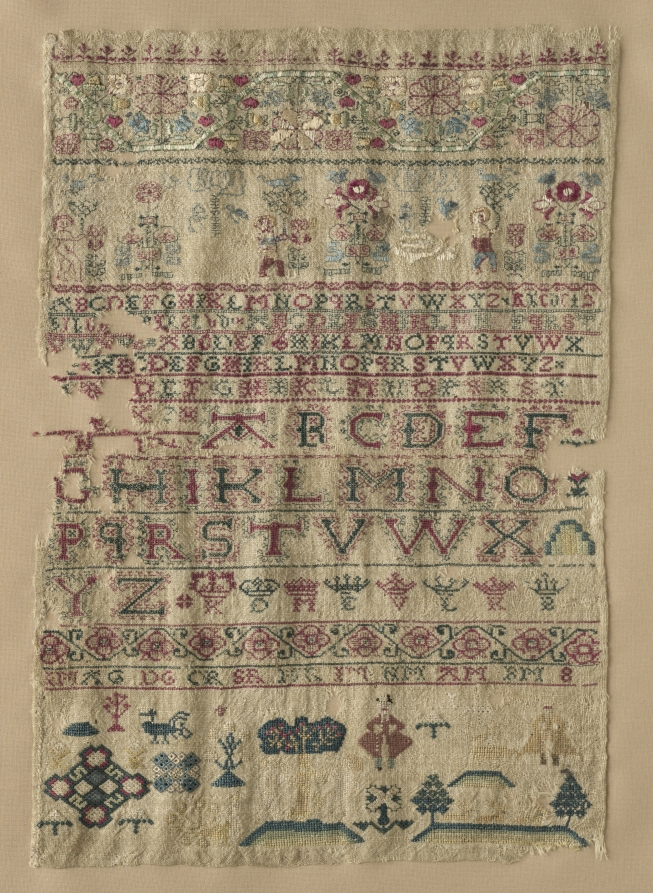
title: Sampler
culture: England, 18th century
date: 1743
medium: silkembroidery on wool (?)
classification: Sampler